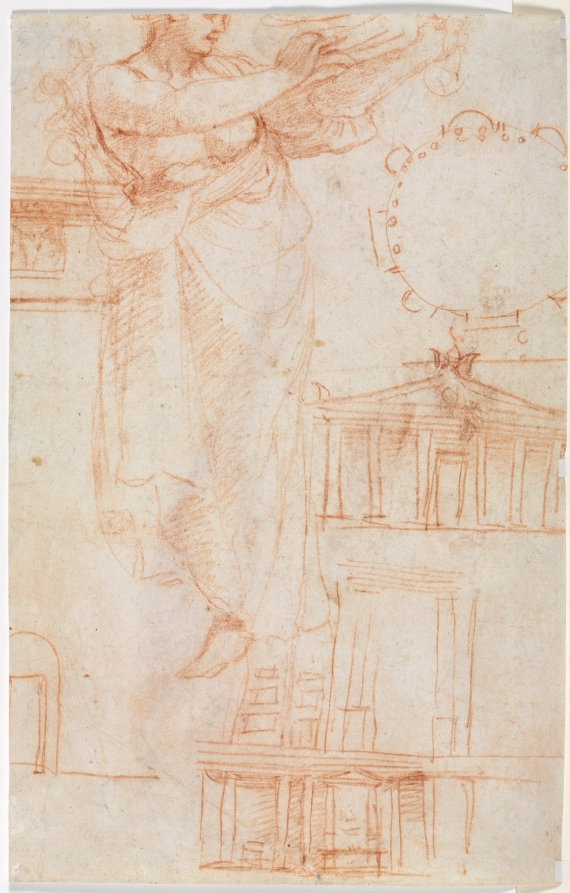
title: A Draped Female Figure (possibly an Amazon) and Architectural Studies (verso)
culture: Northern Italy, Emilia, first half 16th Century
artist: attributed to Correggio (Italian, 1489?-1534)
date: c. 1525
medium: red chalk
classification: Drawing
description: In this chalk study of a lone, fallen soldier, the brown ink inscription at the bottom of the sheet indicates that at one time it was believed to be by Raphael. However, it is now attributed to Correggio based on the sensuous drawing style that focuses attention on some details, like the soldier’s leg and foot, while other contours are barely sketched and shaded. The back, or verso, of the sheet presents quick sketches of classical-style architecture and a woman with a quiver of arrows on her back; she may be an Amazon, one of a race of warrior women skilled in archery, or Diana, goddess of the hunt.